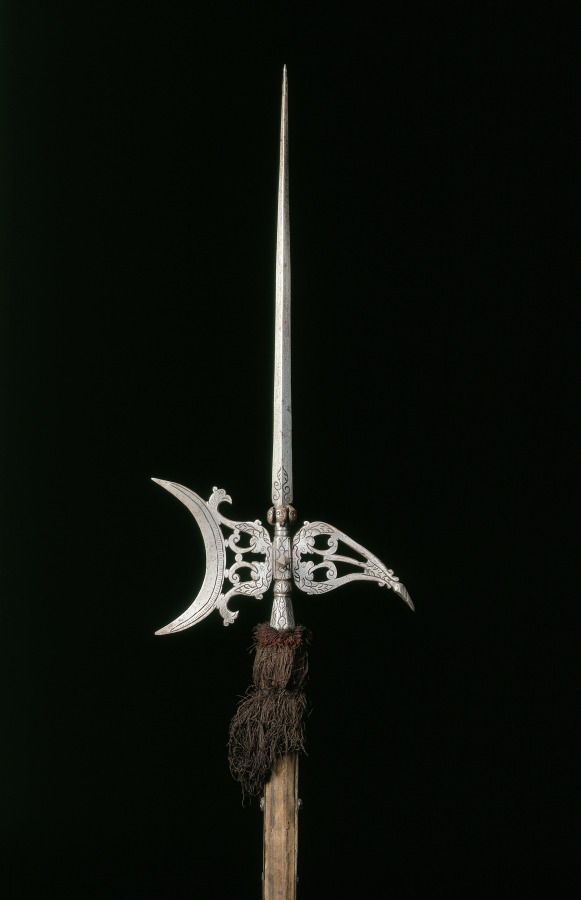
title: Parade Halberd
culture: Italy, 17th century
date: c. 1600–50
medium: steel, engraved; rectangular wood haft with planed corners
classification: Arms and Armor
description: The halberd was a staff weapon favored by European infantries (foot soldiers) of the 1400s and 1500s for its versatility and deadly effect. The word halberd comes from the German words Halm (staff) and Barte (axe). The halberd is, in fact, an axe that served multiple functions: the axe blade was used for hacking, the spike for thrusting, and the beak for piercing plate armor or for pulling a knight from his saddle. The halberd was used by shock troops (those who lead an attack) and by Swiss and German mercenaries. After about 1550, the halberd gradually became less functional. Its large blade provided space for coats of arms and insignia. By the late 1500s, the parade halberd had become a ceremonial weapon for palace guards.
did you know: Highly decorated with remains of silk tassels, this halberd was for ceremonial use.